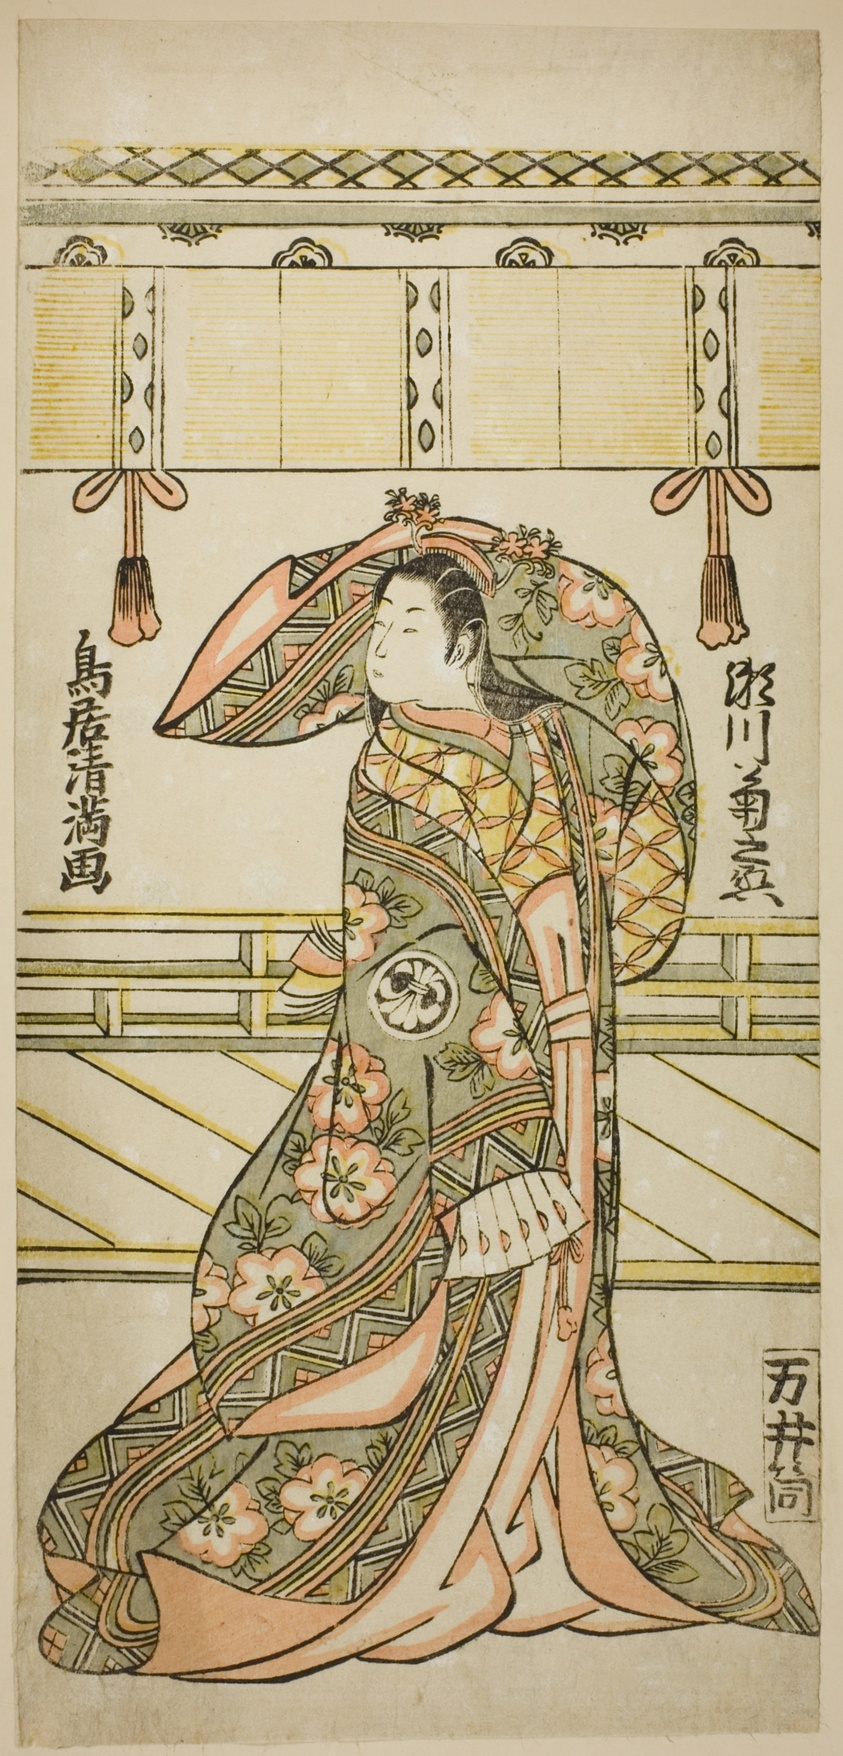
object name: Print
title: The Actor Segawa Kikunojo II as Matsukaze in the play "Kisoeuta Sakae Komachi," performed at the Ichimura Theater in the eleventh month, 1762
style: Japanese (culture or style)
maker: Torii Kiyomitsu I (Japanese, 1735–1785)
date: 1762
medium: Color woodblock print; hosoban, benizuri-e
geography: Japan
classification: woodblock print; print; asian art